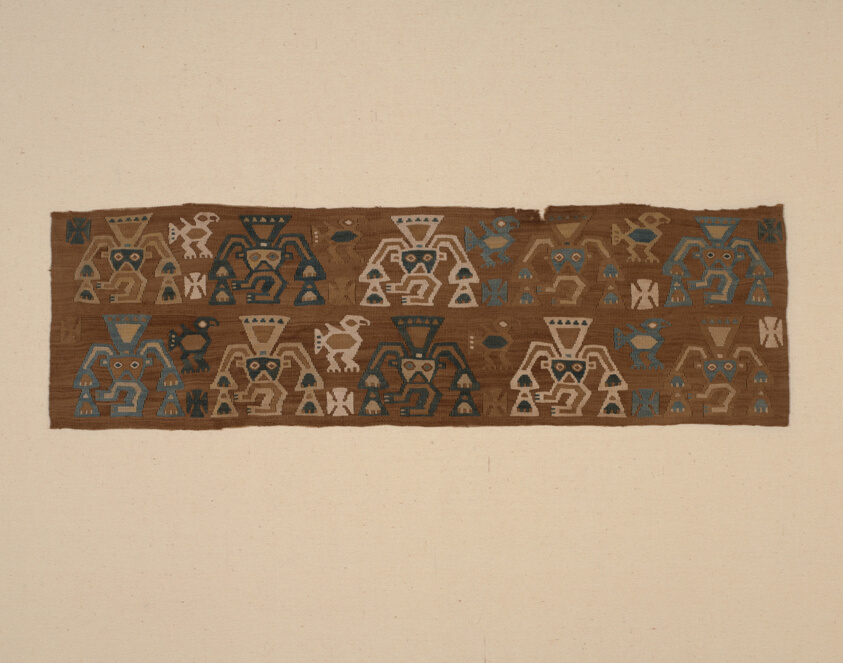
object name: Textile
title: Fragment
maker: Probably north or central coast, Peru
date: A.D. 1000/1476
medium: Cotton, slit tapestry weave with eccentric wefts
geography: Peru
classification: textile; weaving